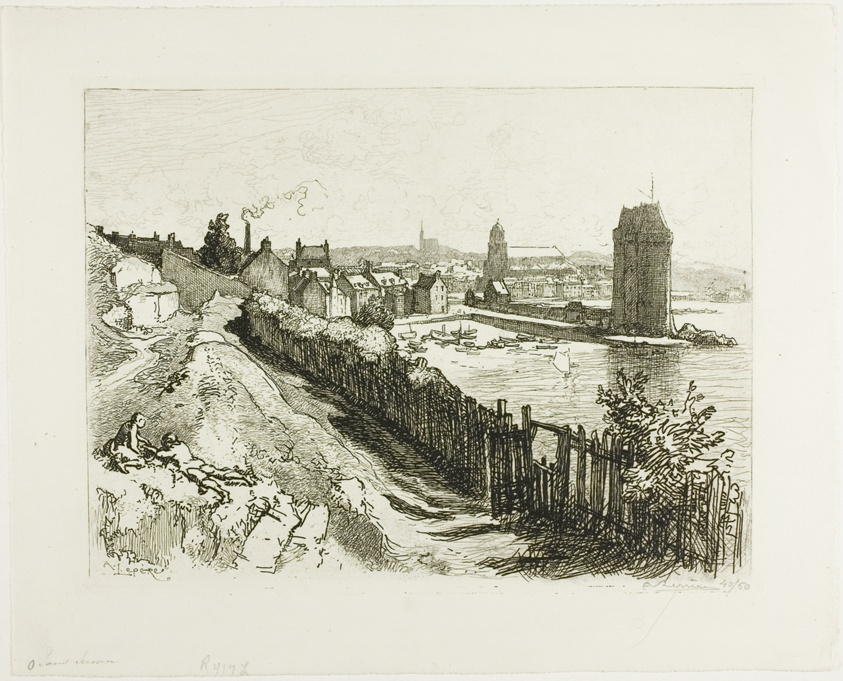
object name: Print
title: Saint-Servan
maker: Louis Auguste Lepère (French, 1849-1918)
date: 1912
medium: Etching on cream wove paper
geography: France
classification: etching; print; prints and drawing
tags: landscapes, prints and drawings